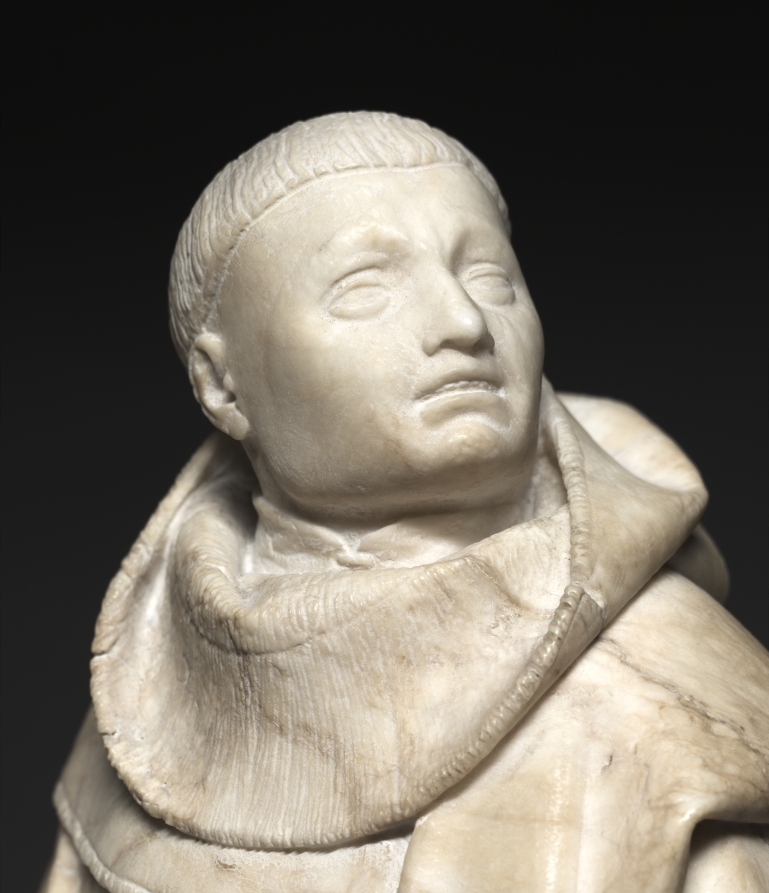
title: Mourner from the Tomb of John the Fearless and Margaret of Bavaria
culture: Spanish, Burgundy, Dijon, 15th century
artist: Jean de la Huerta (Spanish, active Burgundy, 1431–62)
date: 1443–45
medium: salins alabaster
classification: Sculpture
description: This monklike figure has a variously textured monochrome surface. Alabaster’s softness made it easy to carve details like the fabric and fur of the mourner’s robe and the codex pages in his hand. This is one of 40 mourners from an elaborate funeral procession beneath an intricately carved alabaster arcade. This mourner comes from the monastery of Champmol near Dijon, which became a primary burial place for Burgundian dukes. The sculpture was part of the tomb of John the Fearless (1371–1419), commissioned by his son Philip the Good (1396–1467), modeled after the earlier monument for Philip the Bold.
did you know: A plaster cast of this mourner adorns the Tomb of John the Fearless and Margaret of Bavaria in Dijon, France.